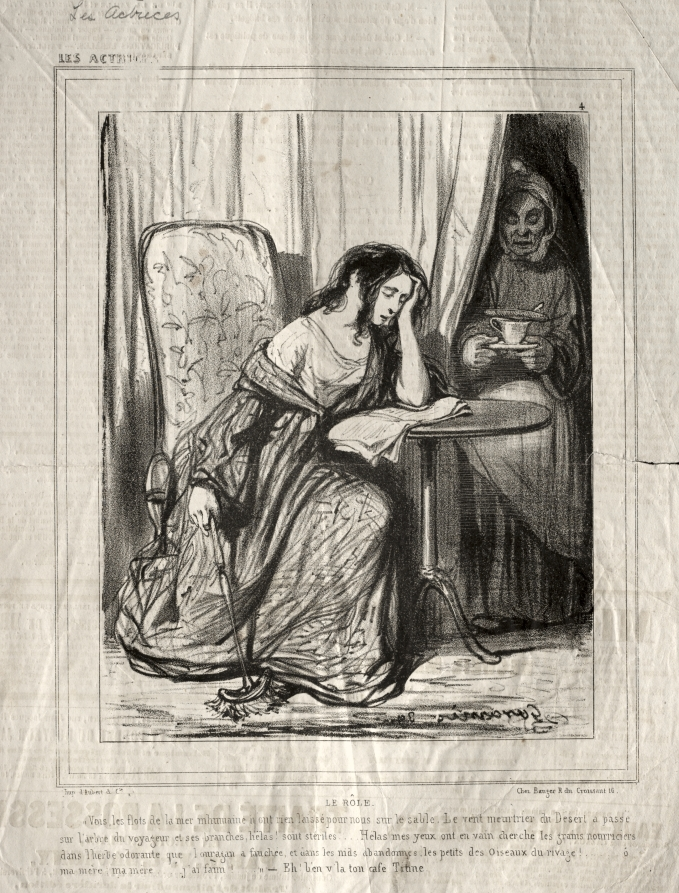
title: Les Actrices: Le Rôle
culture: France, 19th century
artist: Paul Gavarni (French, 1804–1866)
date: 1843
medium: lithograph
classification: Print